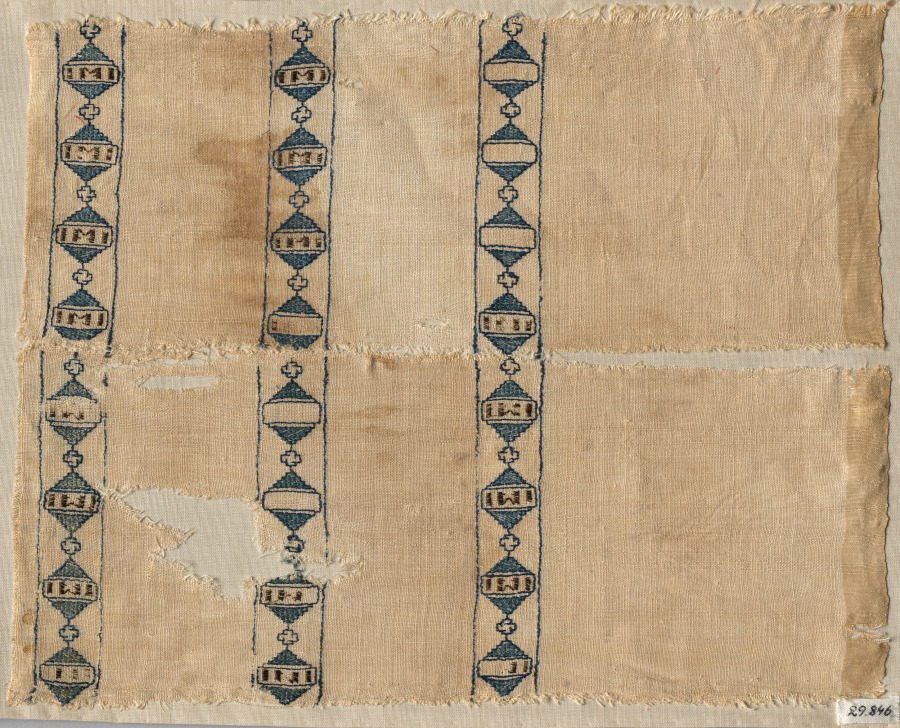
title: Two fragments of a scarf or headdress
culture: Egypt, Mamluk sultanate (1250–1517)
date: 1300s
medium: silk embroidery on linen tabby ground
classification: Embroidery